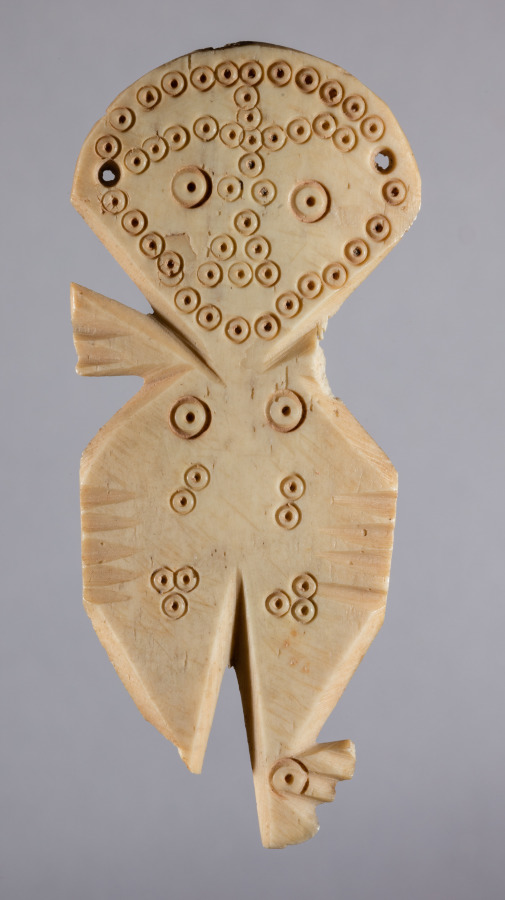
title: Figurine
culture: Iran, early Islamic period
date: 700s - 900s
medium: bone, incised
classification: Miscellaneous